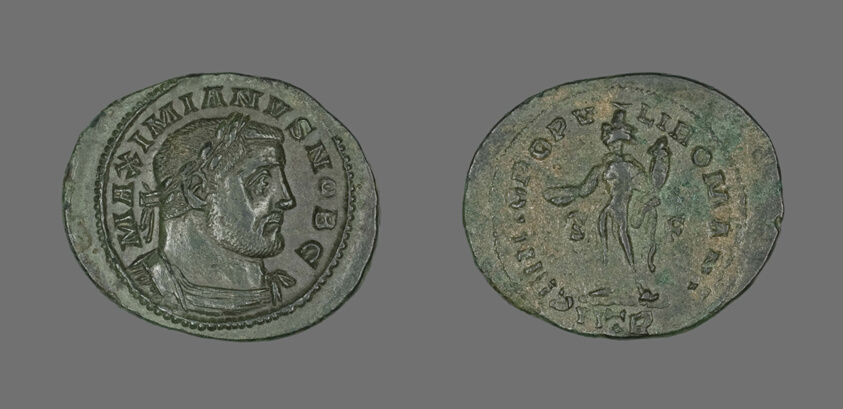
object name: Coin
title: Coin Portraying Emperor Galerius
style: roman (ancient, style or period)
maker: Roman, minted in Trier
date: 305-311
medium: Bronze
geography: Trier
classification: coin; ancient art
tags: portrait